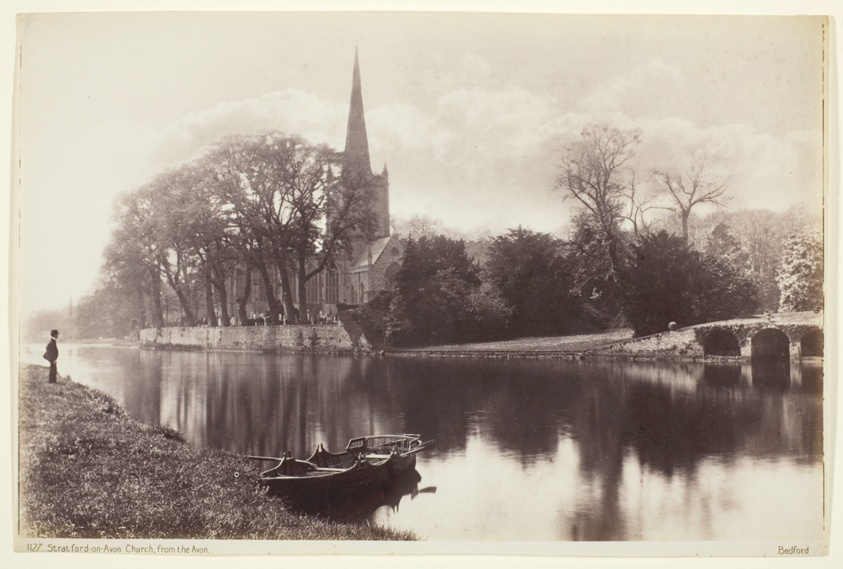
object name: Photograph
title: Stratford-on-Avon, Church from the Avon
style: 19th century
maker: Francis Bedford (English, 1816–1894)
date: 1860/94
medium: Albumen print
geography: England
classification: albumen silver print; photographic process; photography; photograph